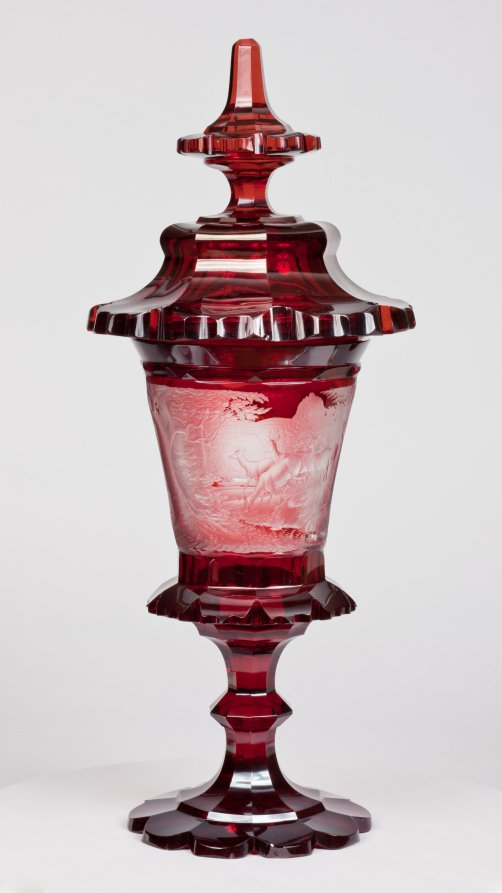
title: Covered Cup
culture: Bohemia, 19th century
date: mid-1800s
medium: ruby glass with engraved decoration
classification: Glass